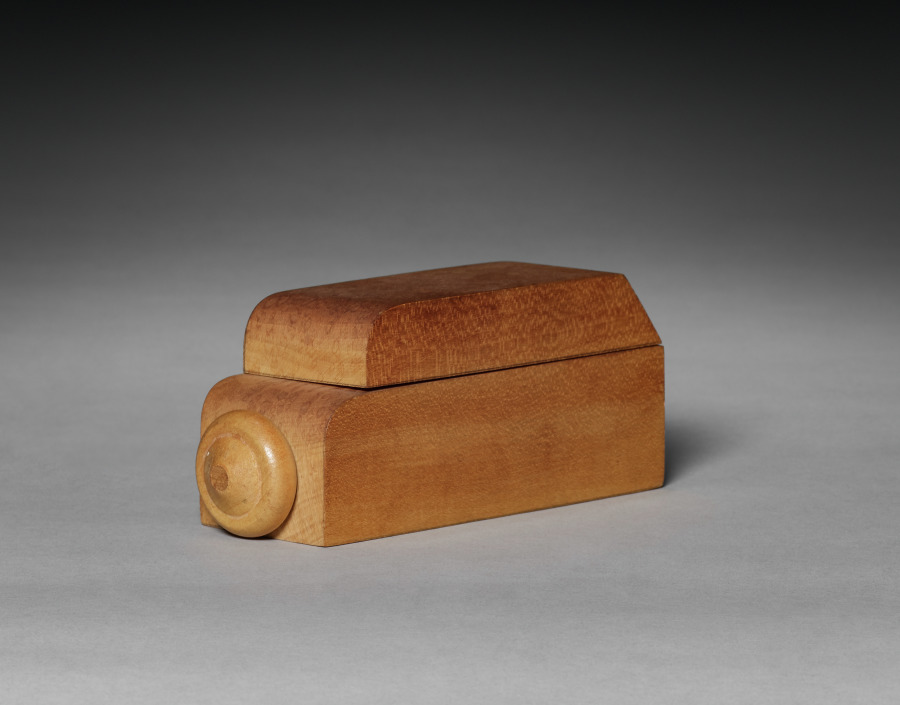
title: Boysen Toys (car)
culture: Denmark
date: 1900s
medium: Wood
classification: Wood